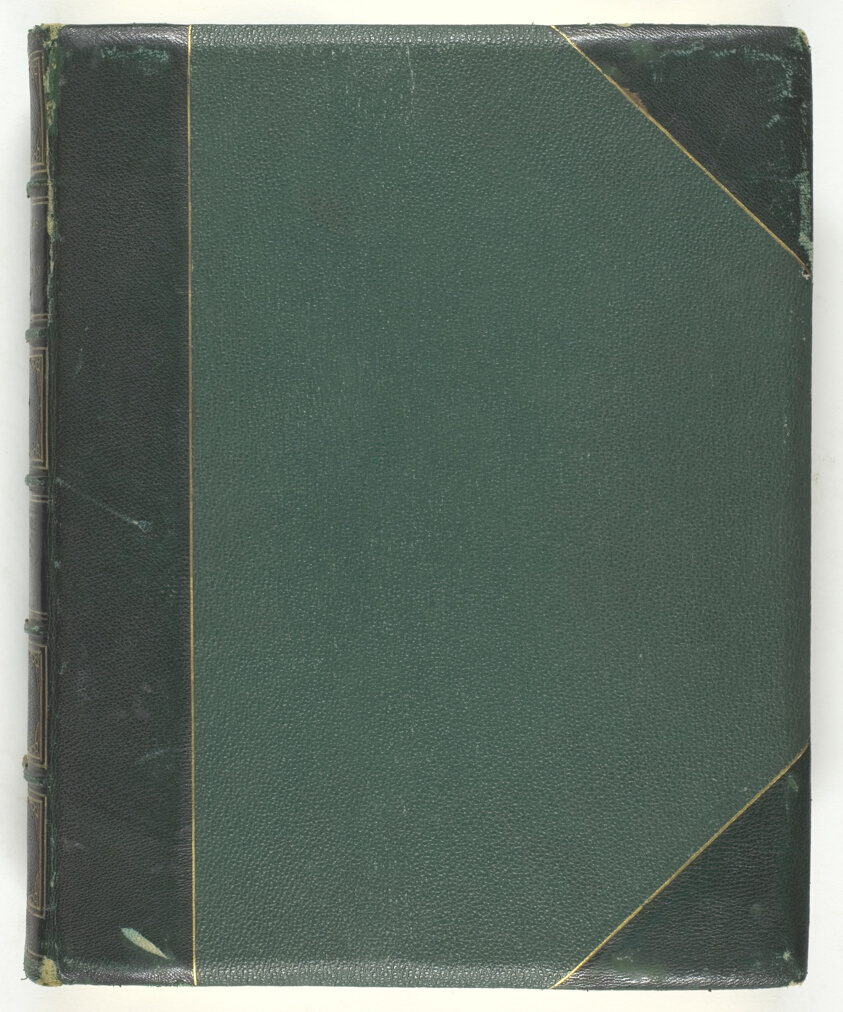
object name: Photograph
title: Sun Pictures of Rocky Mountain Scenery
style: 19th century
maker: Andrew J. Russell (American, 1830–1902), Julius Bien (American, 1826–1909) and; F. V. Hayden (American, 1829–1887)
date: 1870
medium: Album of albumen prints (30)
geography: United States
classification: unidentified; photography; photograph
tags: Collected by Hugh Edwards